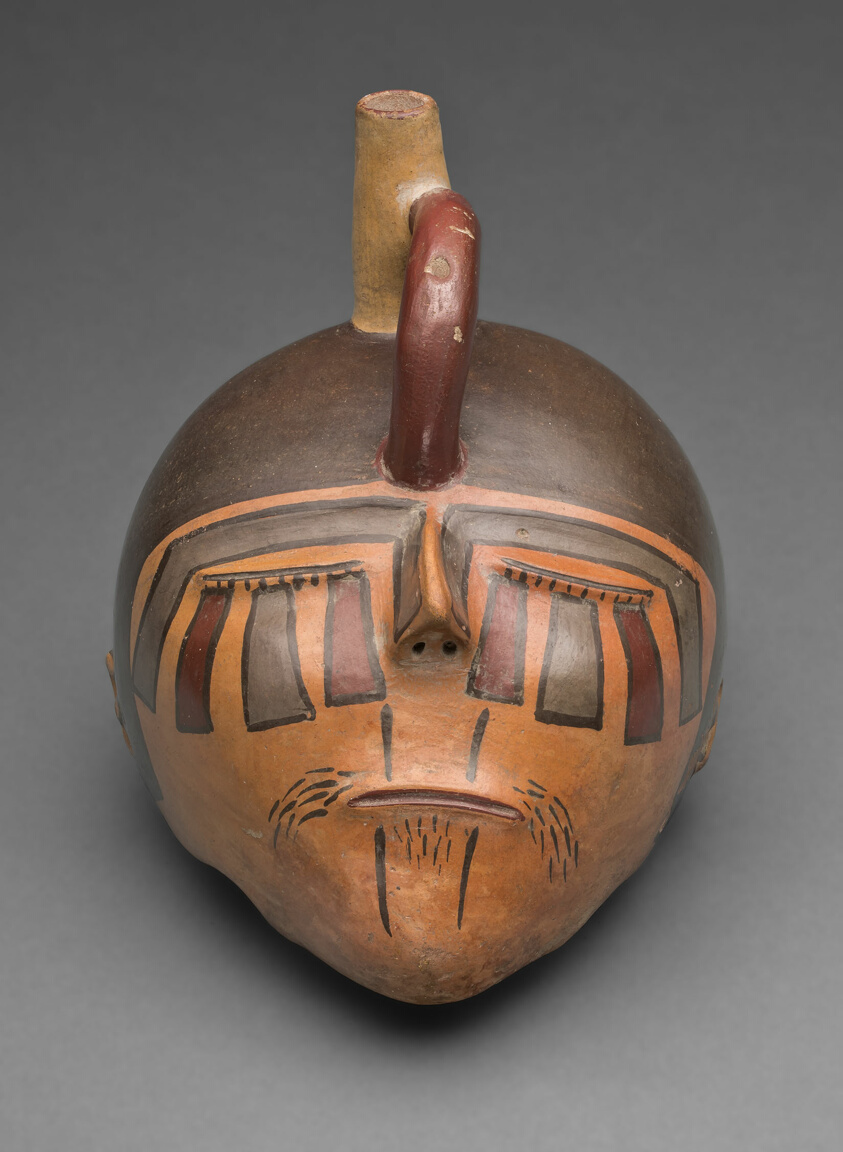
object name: Vessel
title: Bottle in the Form of a Severed Trophy Head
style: nazca, early intermediate period, Pre-Columbian, americas, andes, Arts of the Americas, andean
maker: Nazca; South coast, Peru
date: 180 BCE–500 CE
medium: Ceramic and pigment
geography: Peruvian South Coast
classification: earthenware; art of the americas; ceramics; vessel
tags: sacrifice, ritual sacrifices, rituals, death